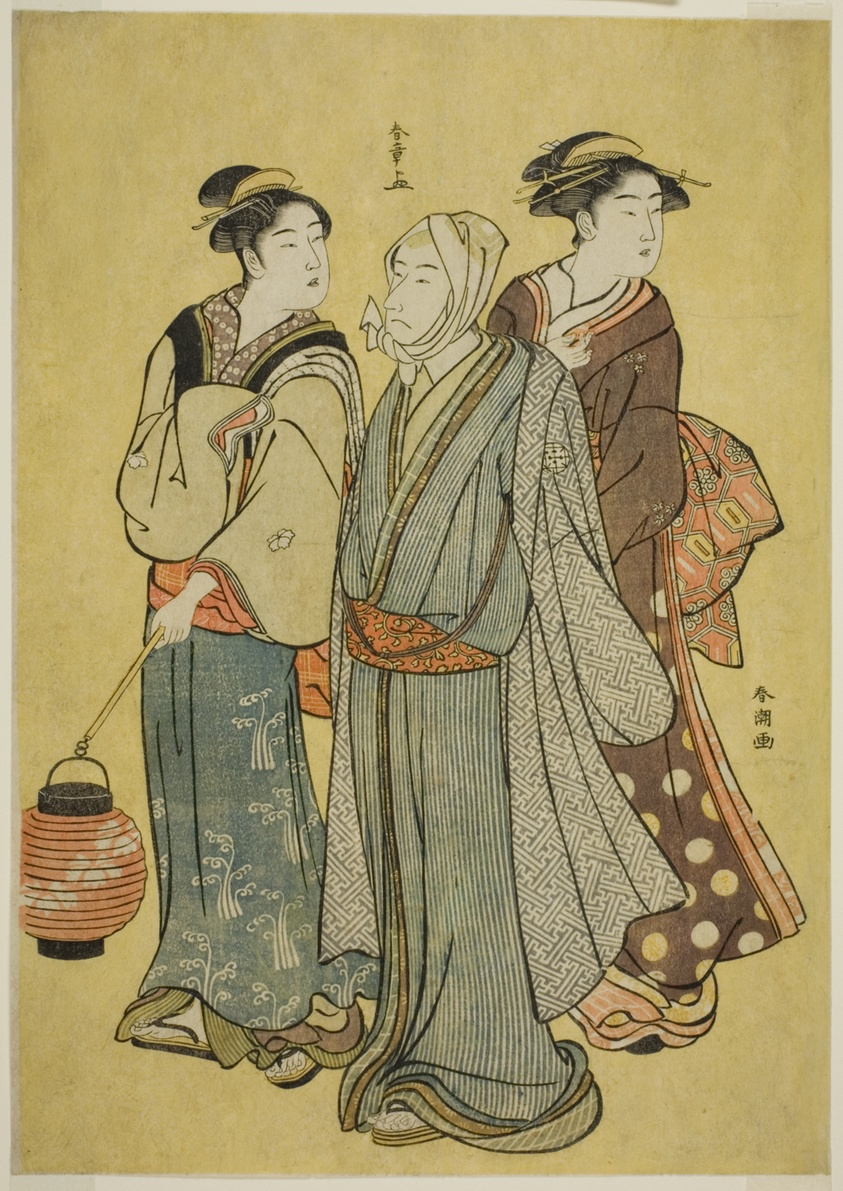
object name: Print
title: A Young Man Dressed as an Actor of the Ichikawa Family (by Shunsho), a Maid and a Geisha (by Shuncho)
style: Japanese (culture or style)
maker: Katsukawa Shunsho; Japanese, 1726-1792; Katsukawa Shuncho; Japanese, active c. 1780-1801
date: late 1780s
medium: Color woodblock print; aiban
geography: Japan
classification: woodblock print; print; asian art